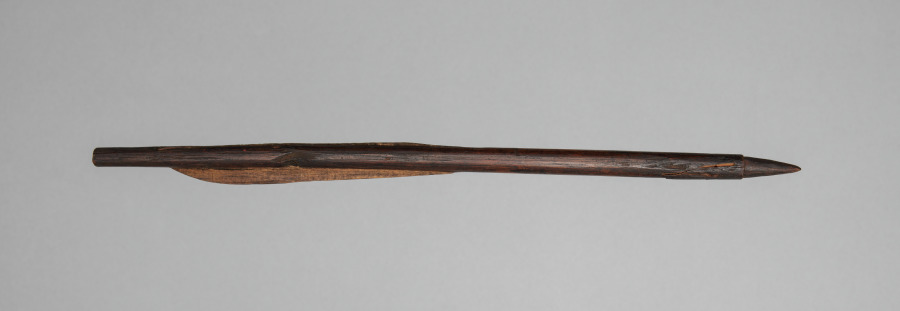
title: Crossbow Bolt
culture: Germany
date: 1500s-1600s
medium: wood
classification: Arms and Armor